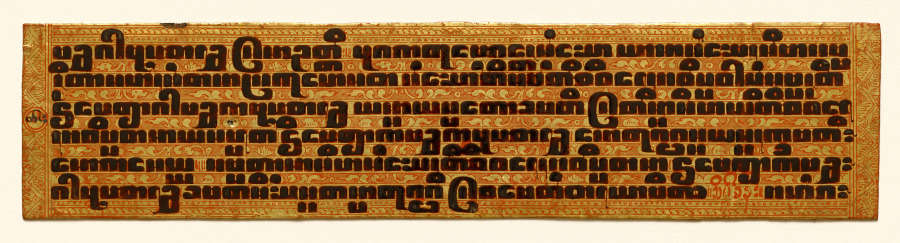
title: Text, folio 12 (verso) from a Kammavacha: Buddhist ordination text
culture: Myanmar (Burma)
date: 1800s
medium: Leaf: lacquer and gilding on cloth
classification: Manuscript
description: In premodern Burma, lay people commissioned lavishly ornamented manuscripts for ceremonial occasions, when officiants would read aloud from the text. Written in black lacquer, the text is in the language of Pali written in a Burmese script. It contains ordination rites and procedures for monastic ceremonies. The second to last page is covered with intricately drawn, winged celestial beings (nats) in gestures of praise. They fly amid intertwining vegetation—denoting bounty—that grows from serpentine forms that refer to rain clouds. Lionlike forms inhabit the space with them. The top and bottom covers are equally ornamented with jeweled floral patterning.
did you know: The Pali text of this manuscript is written in Burmese square script, which is also known as "tamarind seed script."